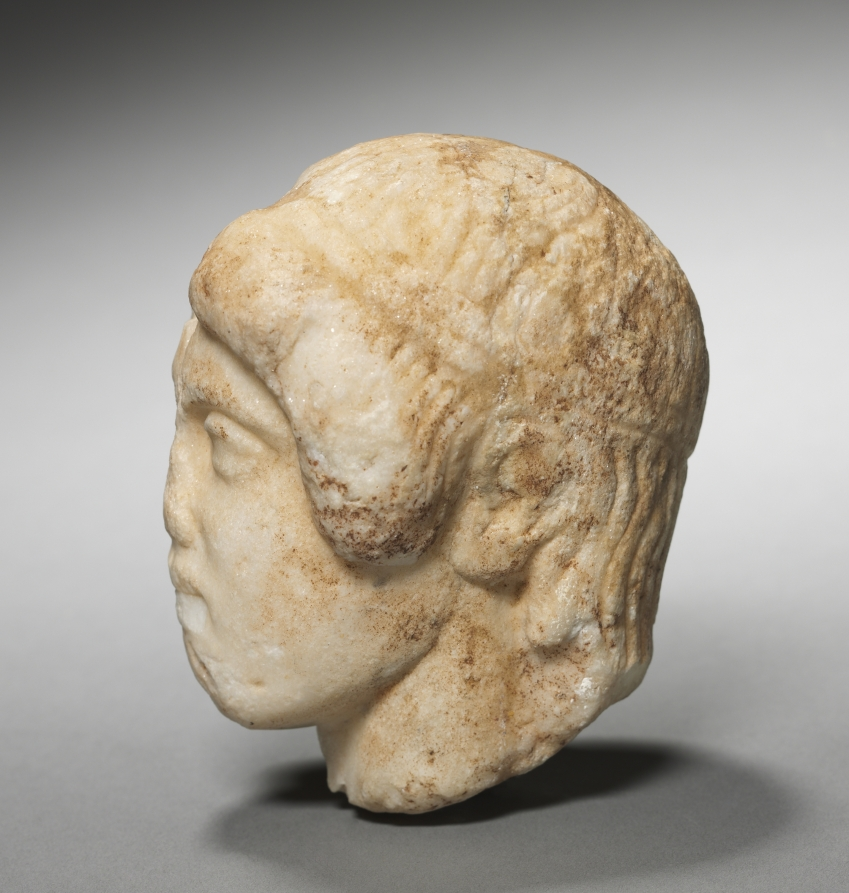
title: Head of a Kore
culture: Greece, Amorgos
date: c. 480–460 BCE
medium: marble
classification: Sculpture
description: This small head probably once belonged to a full-body statuette of a young woman, a miniature of the Archaic Greek kore statue type. She has heavily lidded eyes and wears a double-banded fillet around her hair. The face and front of the hair are damaged and weathered. A statuette such as this one was likely made as a votive gift to a goddess.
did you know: Kore,which means maiden, is also another name for the Greek goddess Persephone.